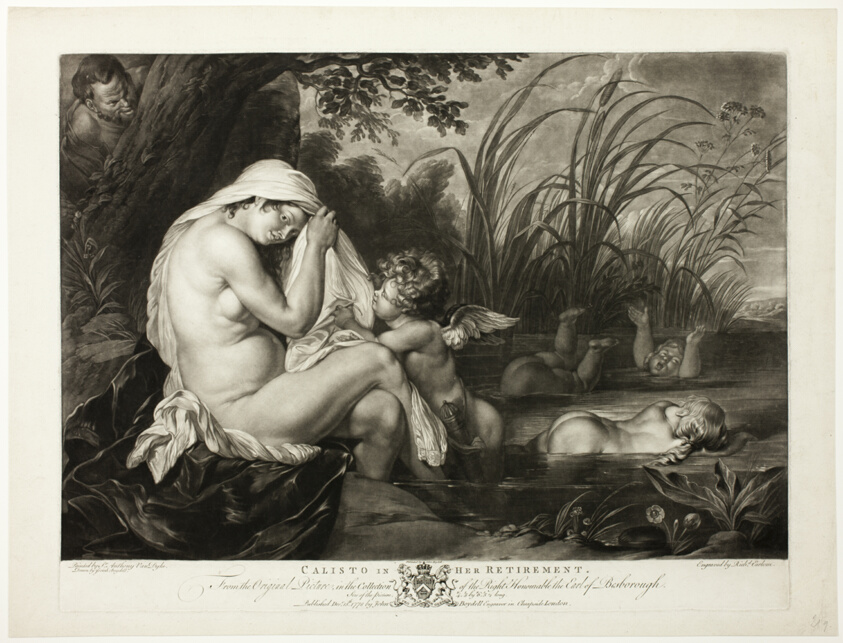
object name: Print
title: Calisto in Her Retirement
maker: Richard Earlom (British, 1743–1822); after Anthony Van Dyck (Flemish, 1599–1641)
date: published 1778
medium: Mezzotint over etching in black on cream laid paper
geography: England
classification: mezzotint; print; prints and drawing